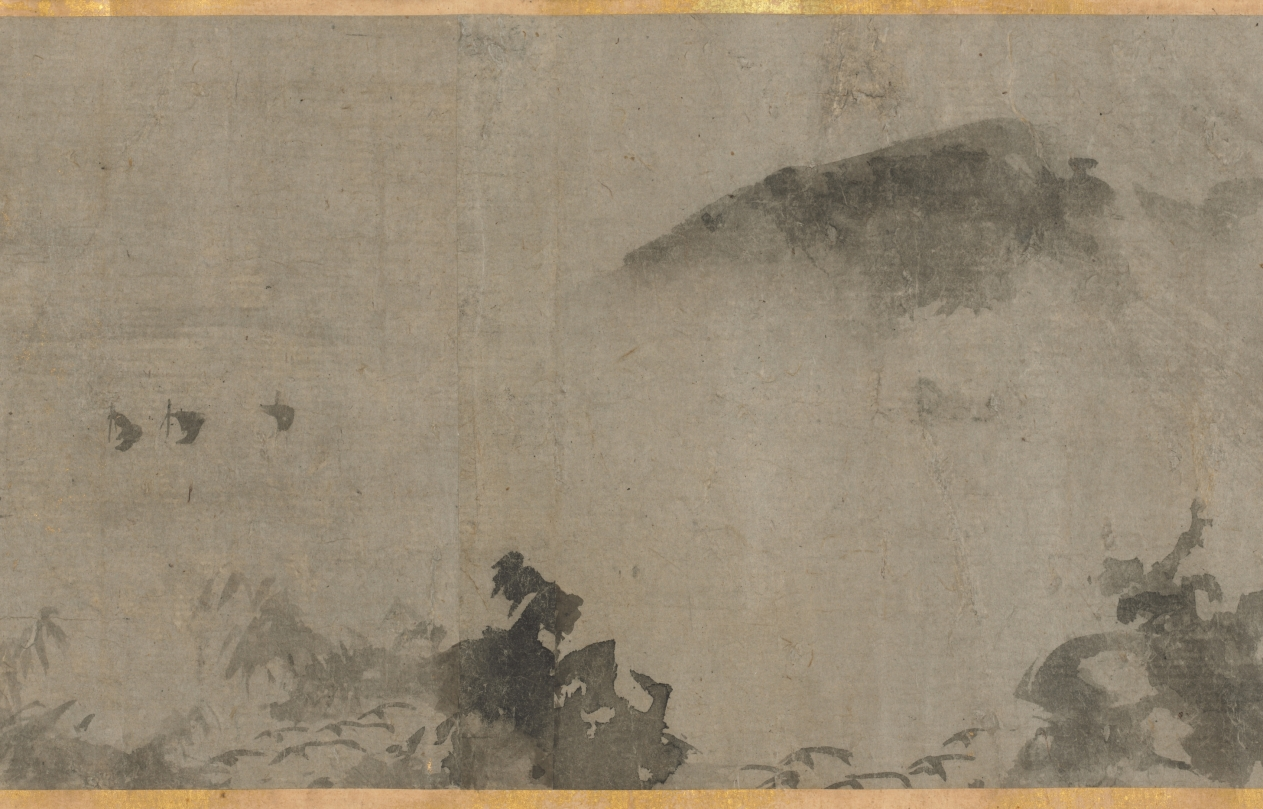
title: Eight Views of Xiao-Xiang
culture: Japan, Muromachi period (1392–1573)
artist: Sesson Shūkei (Japanese, c. 1492–c. 1577)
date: 1500s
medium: handscroll; ink on paper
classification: Painting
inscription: Signature and seal of artist at end of painting.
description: Eight Views of the Xiao and Xiang Rivers can be traced to 11th-century Chinese poems and paintings, the depiction of which had also become popular among Korean and Japanese painters. Xiao-Xiang refers to the region in present-day Hunan province where the Xiao and Xiang rivers converge. Few painters of the Eight Views had in fact seen the scenery; rather, they were trying to portray in ink and wash the lyrical qualities of dim light and a misty atmosphere typical of that region. Each of the poetic titles suggests a time of day, a season, or specific atmospheric conditions—subjects that challenged the abilities of the most talented artists. In this miniature painting (shukuzu) of the Muromachi period, Japanese Zen monk and painter Shukei Sesson depicted all eight views featured in Chinese prototypes: Wild Geese Descending to Sandbar; Returning Sails Off a Distant Coast; Mountain Market in Clearing Mist; River and Sky in Evening Snow; Autumn Moon over Dongting Lake; Night Rain on the Xiao and Xiang; Evening Bell from Mist-Shrouded Temple; and Fishing Village in Evening Glow.